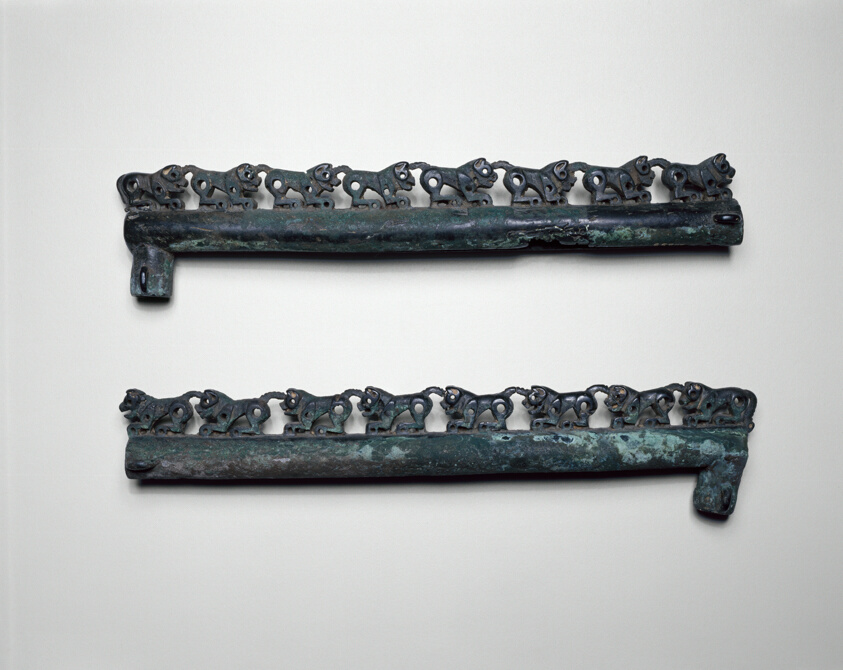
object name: Metalwork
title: Ornamental Fitting with Crouching Felines (one of pair)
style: Chinese (culture or style)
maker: Northeastern China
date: 6th/4th century B.C.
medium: Bronze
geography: China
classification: bronze; metal; fitting; asian art; metalwork